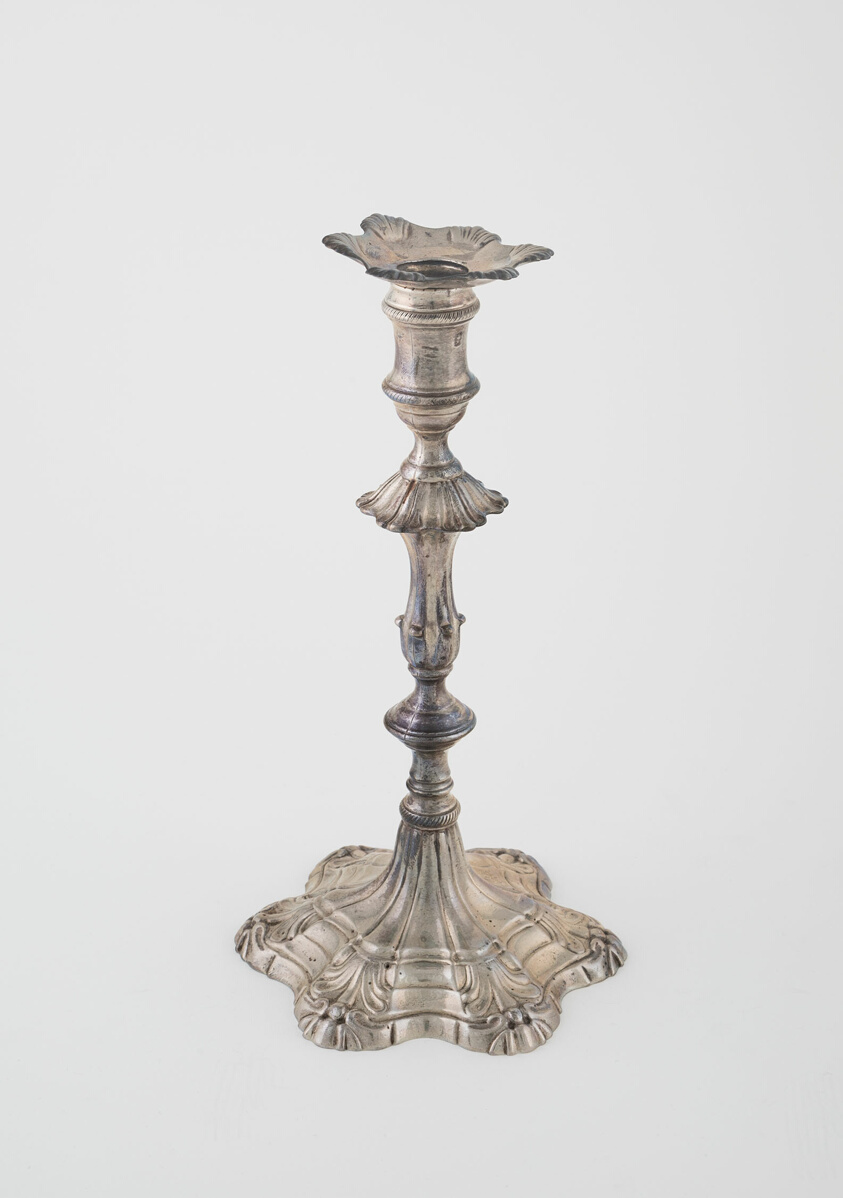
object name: Metalwork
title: Candlestick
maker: Probably Ebenezer Coker; English, 1738-1783; London, England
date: 1762/63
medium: Silver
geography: London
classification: candleholder - candlestick; candleholder; silver; metalwork; european decorative arts